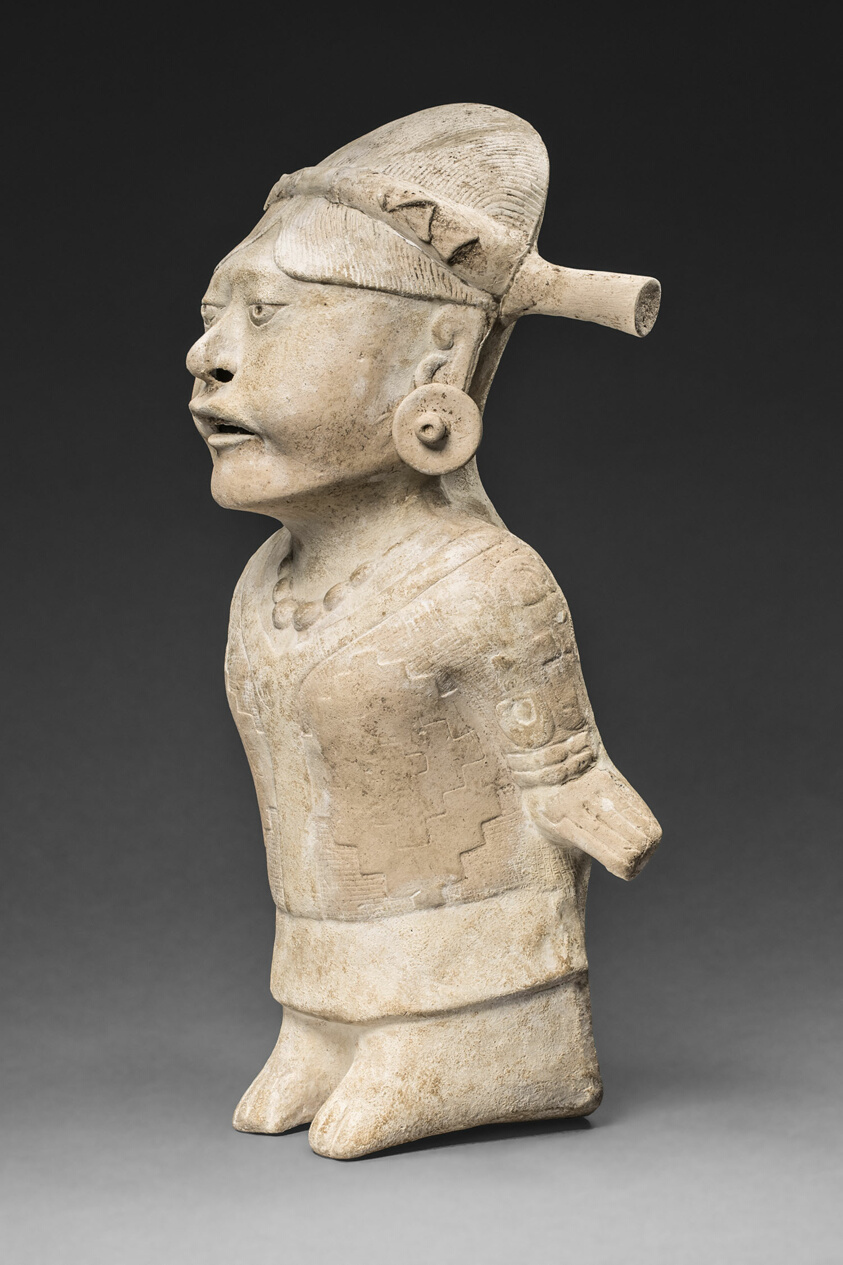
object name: Sculpture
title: Figure of a Woman in Ceremonial Dress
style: Nōpiloa, late classic, classic, mesoamerican, Pre-Columbian, americas, classic veracruz, totonac, Arts of the Americas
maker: Possibly Totonac, Nopiloa; Veracruz, south-central Gulf Coast, Mexico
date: 700–900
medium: Ceramic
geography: Southern Veracruz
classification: earthenware; ceramics; sculpture; art of the americas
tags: people, textile pattern, female, costume